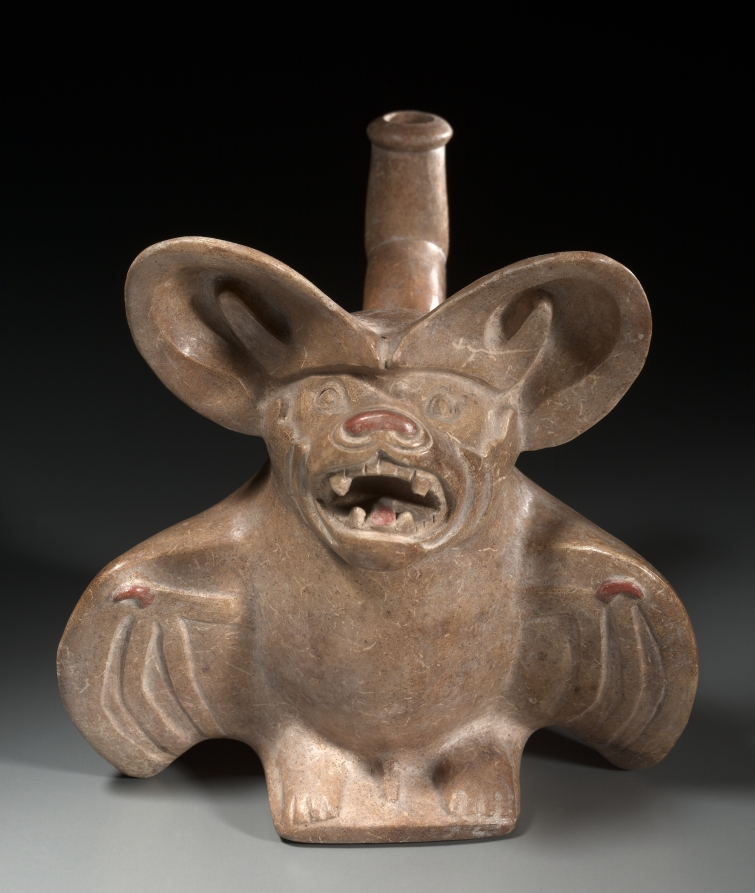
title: Big-Eared Brown Bat Vessel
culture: Central Andes, North Coast, Moche people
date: 200–850 CE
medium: ceramic, slip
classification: Ceramic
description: This bat, perhaps shown opening its wings before taking flight, illustrates Moche artists’ keen interest in realism and in capturing activity at its peak. Moche bat symbolism may be linked to the animal’s paradoxical traits—for instance, bats fly but have fur rather than feathers. Such traits may have caused the Moche to link bats with transitional states, such as the passage between life and death. The vessel depicts a member of the Histiotus mochica species, a big-eared brown bat that researchers described in 2021 and, due to this vessel, named in honor of the Moche, also known as the Mochica.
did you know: This vessel depicts a big-eared brown bat.